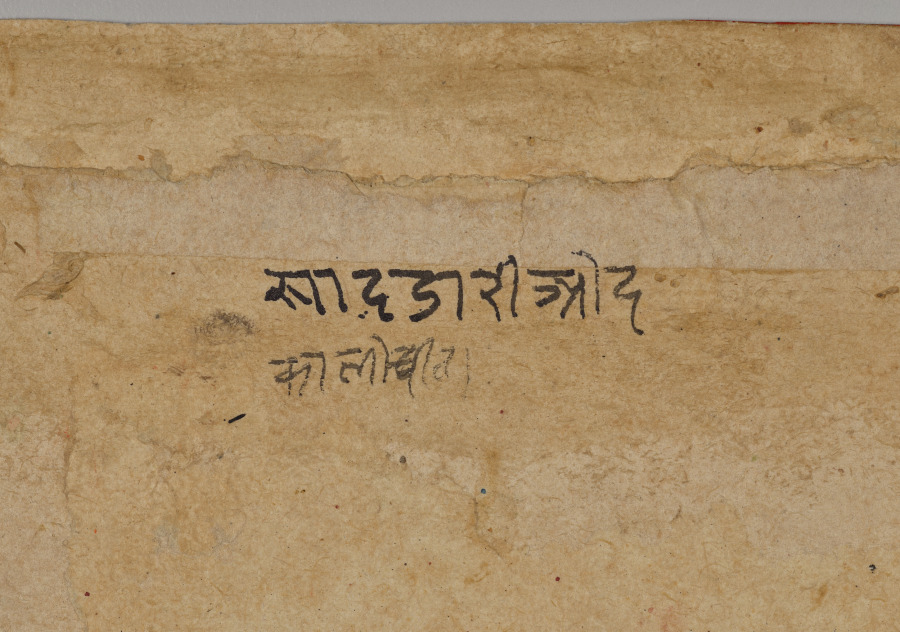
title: Maharana Sangram Singh II of Mewar (r. 1710–34) and Stages a Boar Hunt with Tigers at Sadri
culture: Northwestern India, Rajasthan, Rajput Kingdom of Mewar, Udaipur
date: c. 1720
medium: gum tempera, ink, and gold on paper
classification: Painting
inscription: [[verso, in red]] 2/48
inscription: [[verso, upper right corner]] sāḍāri od kālo cita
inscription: [[verso, in black, along bottom]] 102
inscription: [[verso, in black, to right of old inventory number]] Kimat RS 150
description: The king, who has the title of “maharana” in this region, is identifiable by his halo. At the bottom of the composition, he is pictured three times, welcoming two distinguished visitors who arrived in palanquins. He is shown again, standing behind a safety net at the corner of the white platform. He aims his arrow to shoot the boar and demonstrate his skill and virility. Two tigers are led into the arena at the top edge, and they are depicted multiple times chasing and capturing the prey.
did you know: The enclosure wall is shown from multiple perspectives, sometimes from above, sometimes in elevation.